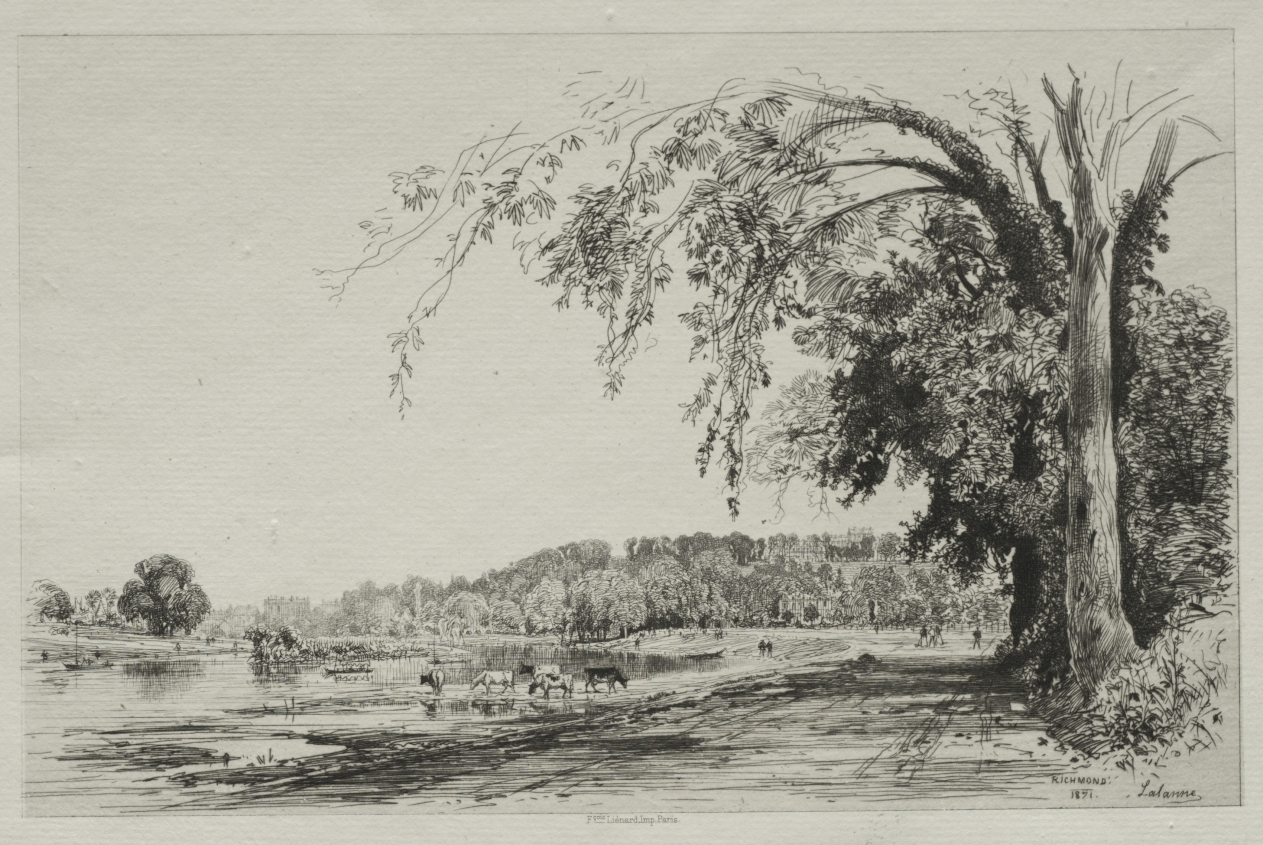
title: Richmond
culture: France, 19th century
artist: Maxime Lalanne (French, 1827–1886)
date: 1871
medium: etching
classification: Print